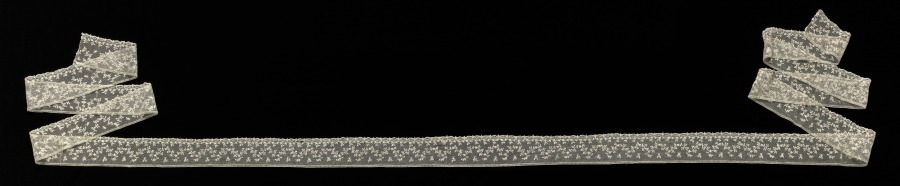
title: Lace Edging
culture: France, Argentan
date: 1715–74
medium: Linen: needle lace (Point de Argentan)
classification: Lace